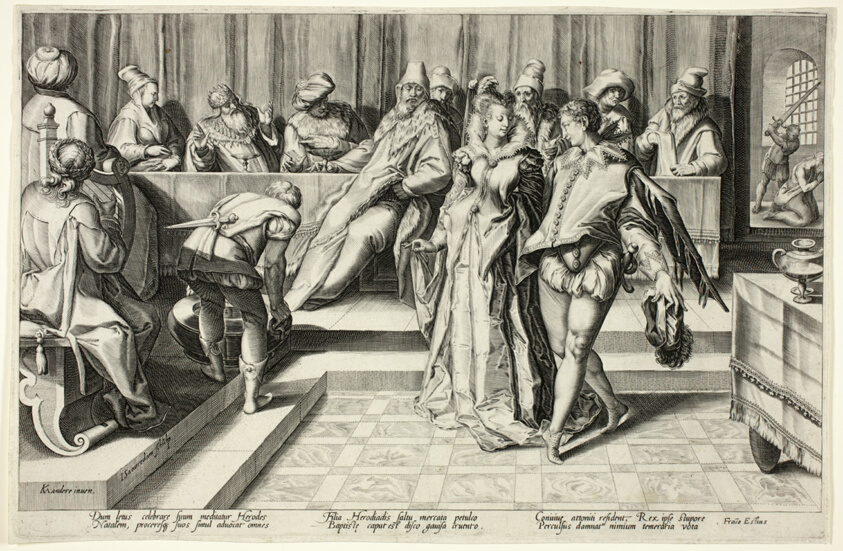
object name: Print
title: Salome Dancing Before Herod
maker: Jan Saenredam (Dutch, 1565–1607); after Karel van Mander (Dutch, 1548–1606)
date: c. 1592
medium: Engraving in black on ivory laid paper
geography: Netherlands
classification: engraving; paper; print; prints and drawing